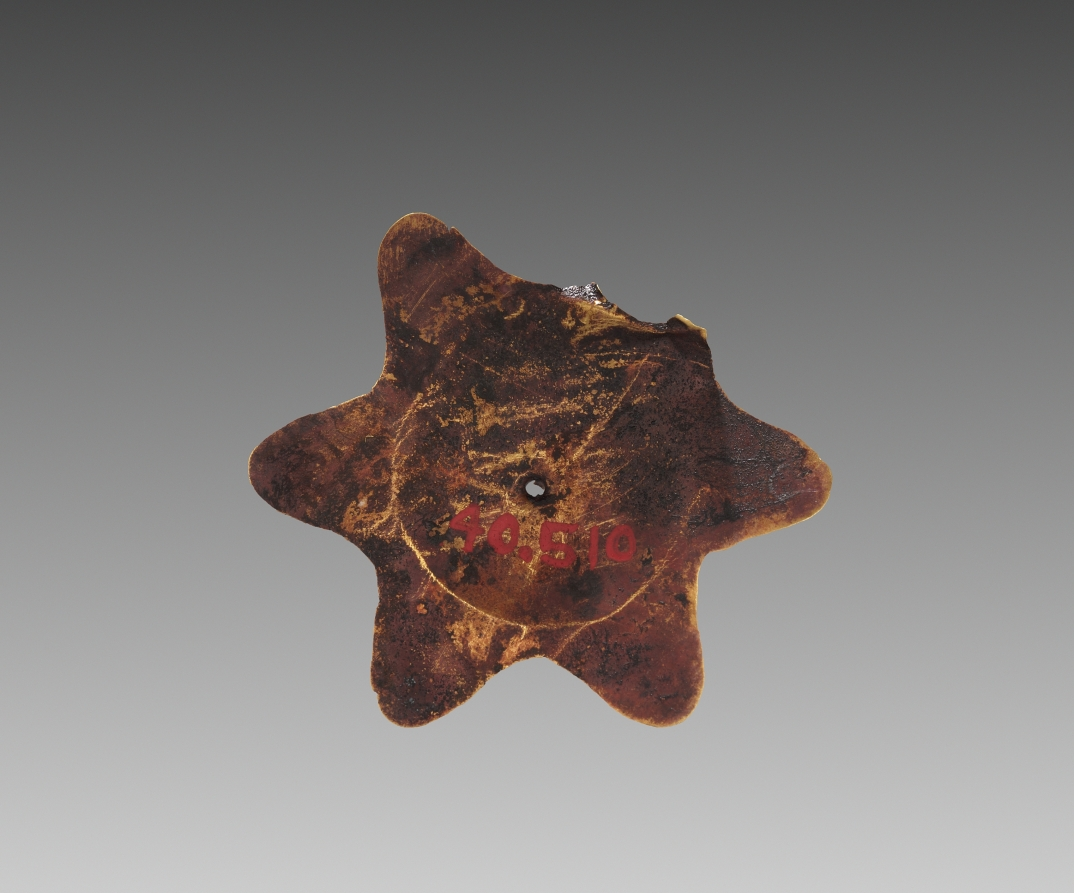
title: Headdress Ornament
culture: Peru, South Coast, Paracas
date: c. 300 BCE–200 CE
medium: hammered and embossed gold-copper alloy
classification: Jewelry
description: A similar star-shaped metal ornament is present on a human-hair wig from a mummy excavated at the Paracas Necropolis site. The wig has tresses wrapped with colored yarns, and a long headband wrapped many times around the head. The star-shaped ornament is attached to the headband, and a circular metal ornament is attached to the braid.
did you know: Tumbaga is an alloy made by blending gold with copper, which may give the gold a rosy hue.